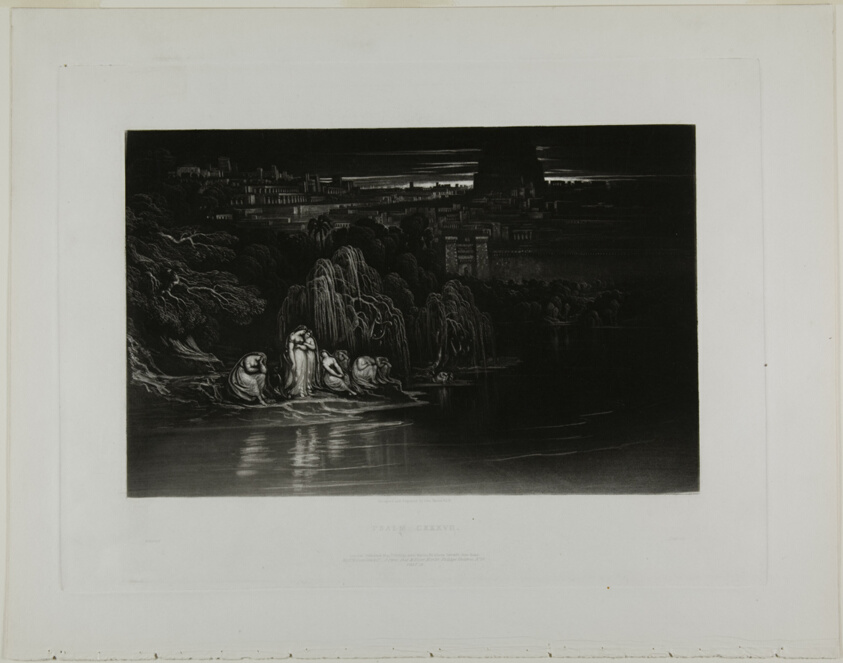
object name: Print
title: Psalm CXXXVII, from Illustrations of the Bible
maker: John Martin (English, 1789-1854)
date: 1835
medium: Mezzotint in black on ivory wove paper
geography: England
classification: mezzotint; print; prints and drawing